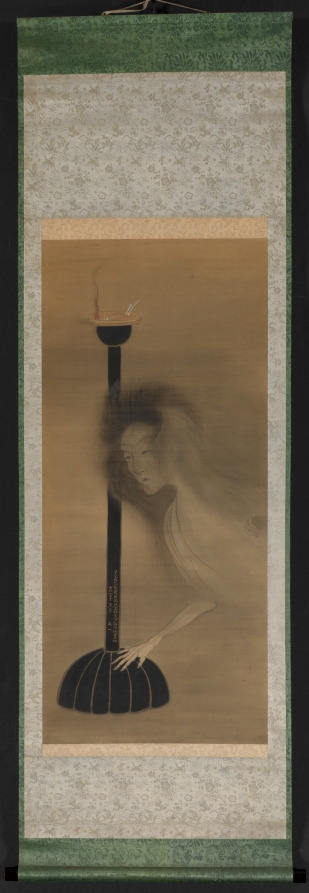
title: Ghost and Oil Lamp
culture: Japan, Edo period (1615–1868)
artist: Tani Bun'ichi (Japanese, 1787–1818)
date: 1810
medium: hanging scroll, ink, color, and gold on silk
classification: Painting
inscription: artist's inscription on stem of oil lamp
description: Tani Bun’ichi was the adopted son of Tani Buncho (1763-1840), a master painter and connoisseur. A Bun’ichi painting remarkably similar to this one that depicts a ghost by a lacquer lamp stand, is in the collection the Tokyo temple Zensho-an. That painting once belonged to Sanyutei Encho (1839-1900), a famed raconteur of ghost stories who donated his collection of ghost paintings to the temple. An inscription in gold on the lamp stand in this painting, identical in content to that on the Zensho-an painting, indicates that it was executed in the 12th month of 1810. Bun’ichi explains that he did not like painting ghosts, but tried it out after listening to a person by the name of Ono.